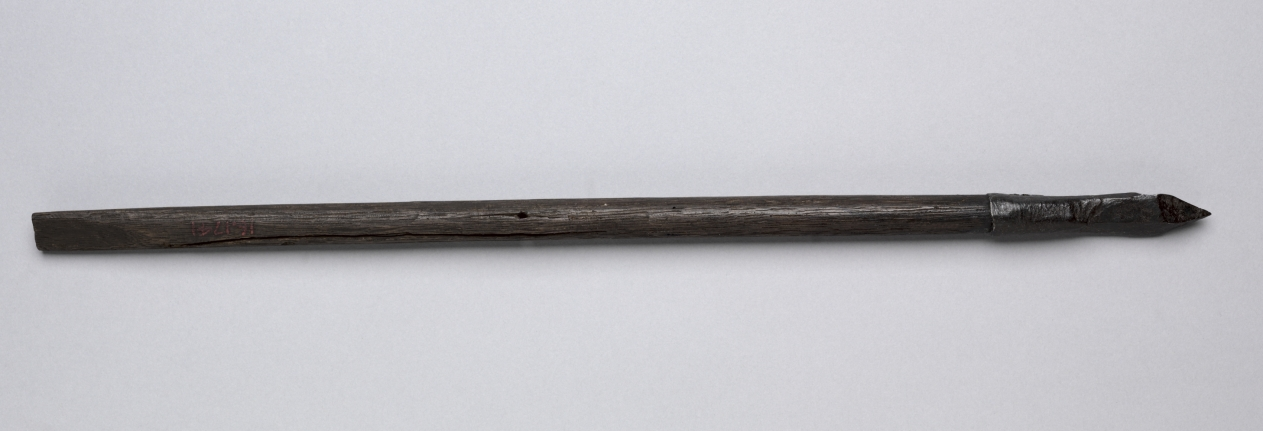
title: Crossbow Bolt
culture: Germany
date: 1500s-1600s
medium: wood, leather, steel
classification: Arms and Armor